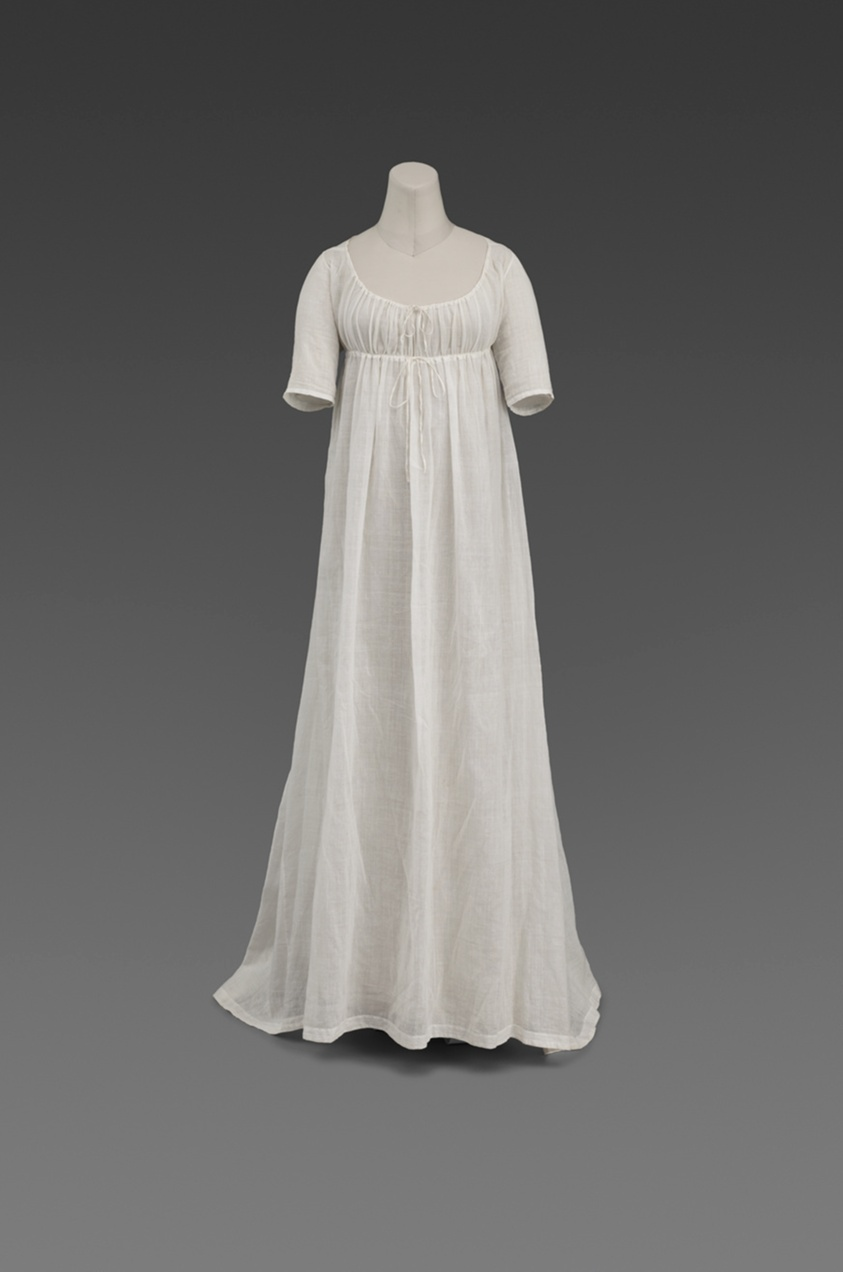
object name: Costume and Accessories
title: Woman's Day Dress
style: Neoclassicism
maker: Made in France with cotton imported from India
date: c. 1800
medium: Cotton, hand-spun, hand-woven plain weave called mulmul or muslin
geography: India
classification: costume; dress (garment); clothing; garment; textile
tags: dresses, fashion, garment, clothing, costume